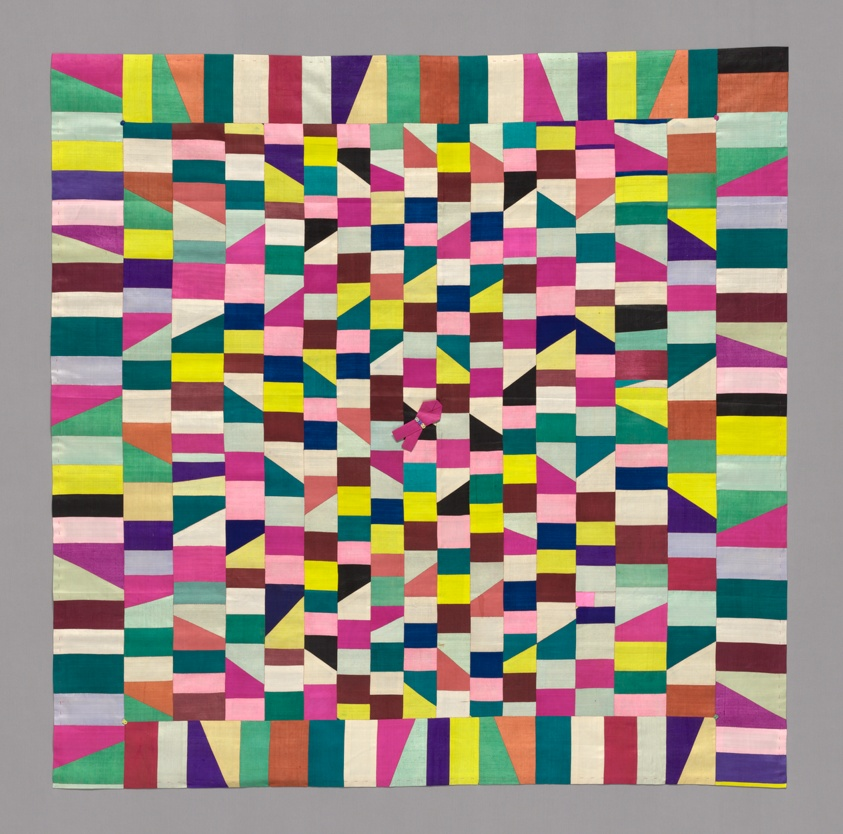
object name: Textile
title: Wrapping Cloth, Pojagi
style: Korean (culture or style)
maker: Korea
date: 19th century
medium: Silk, plain weave; pieced; attached ribbon and cord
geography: Korea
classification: textile; weaving; costume